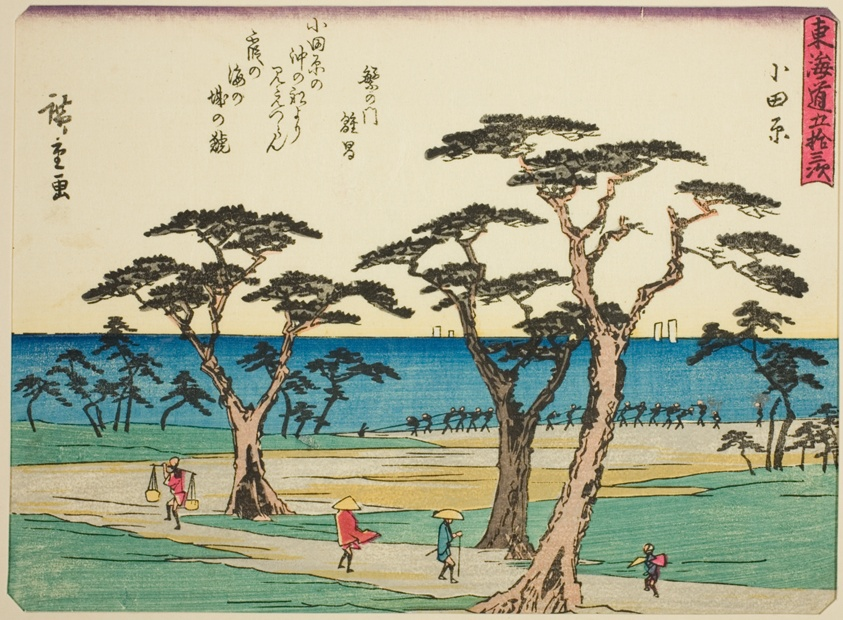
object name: Print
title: Odawara, from the series "Fifty-three Stations of the Tokaido (Tokaido gojusan tsugi)," also known as the Tokaido with Poem (Kyoka iri Tokaido)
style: Japanese (culture or style)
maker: Utagawa Hiroshige 歌川 広重; Japanese, 1797-1858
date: c. 1837/42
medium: Color woodblock print; chuban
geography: Japan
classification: woodblock print; print; asian art